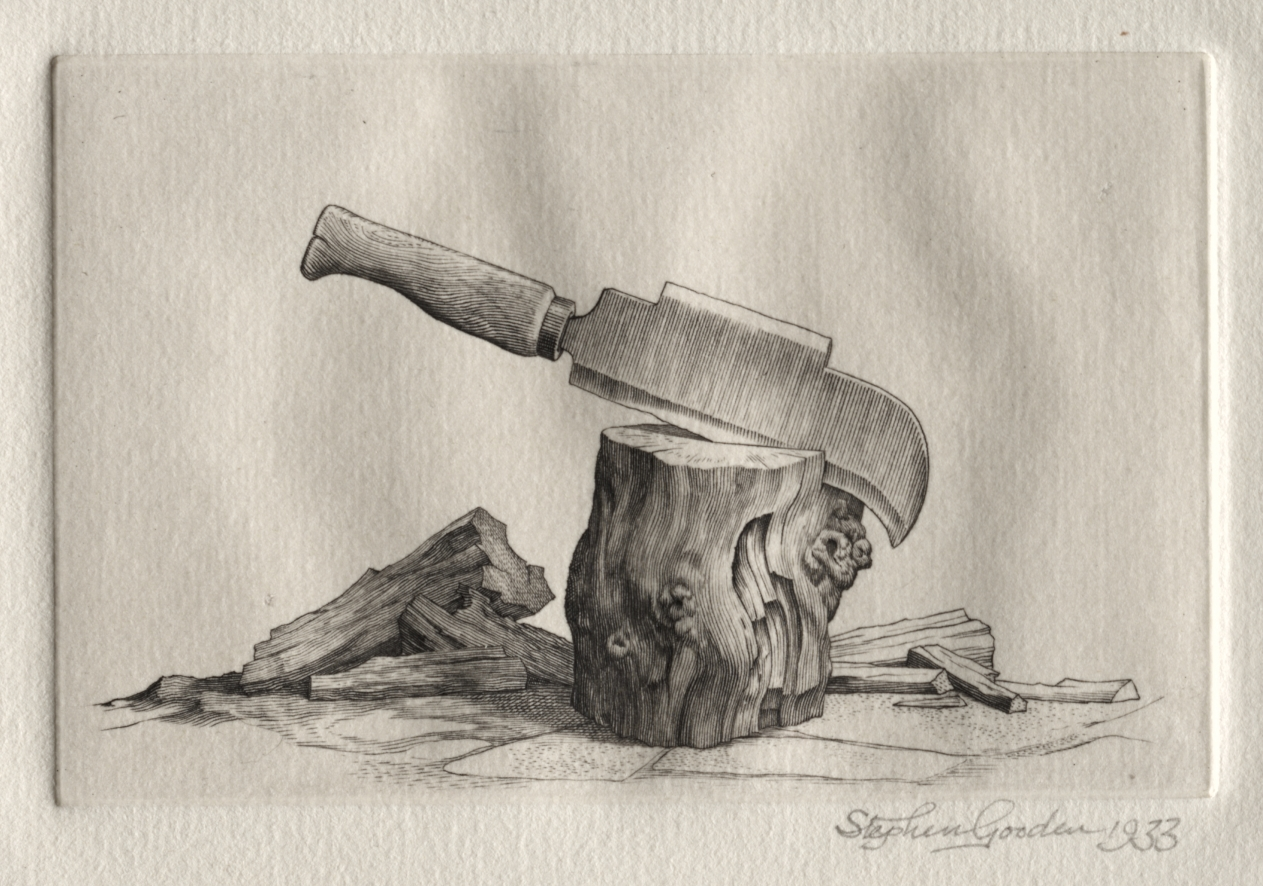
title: Illustration for "Peronnik the Fool": A Bill and a Wooden Block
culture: England, 20th century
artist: Stephen Gooden (British, 1892–1955)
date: 1933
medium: engraving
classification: Print